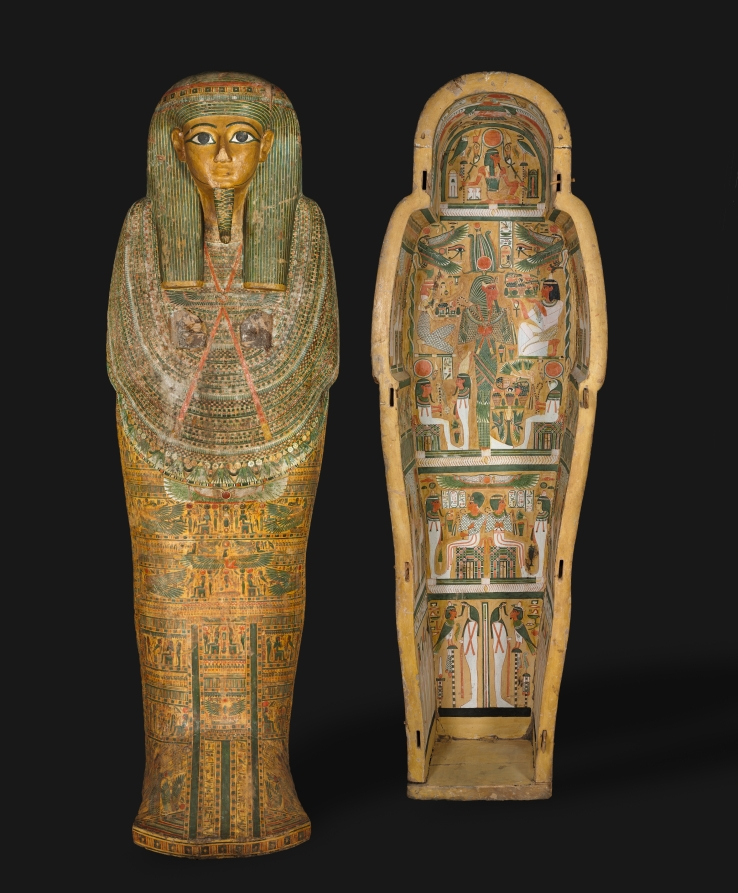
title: Coffin of Bakenmut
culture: Egypt, Thebes, Third Intermediate (1069–715 BCE), Dynasties 21–22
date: c. 1000–900 BCE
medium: gessoed and painted sycamore fig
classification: Funerary Equipment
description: The coffin of Bakenmut is one of the finest examples of painted wooden coffins made for the priests of Amen and their families at Thebes during Dynasty 21 and early Dynasty 22. The pharaohs of this time were no longer buried in the Valley of the Kings, but instead built tombs in the Delta, far to the north, where they resided. Security was lax in the Theban necropolis. The coffins and funerary goods of the wealthy citizens of Thebes were placed in unmarked and undecorated family tombs cut into the cliffs on the west bank of the Nile. All the care and detail that in more prosperous times were devoted to the decoration of the tomb chapel were now lavished on the elaborately painted coffins. Every available surface is crowded with religious scenes, images of funerary gods and goddesses, protective spells, and magical symbols. The deceased appears mummiform. An elaborate floral collar entirely covers the upper body, exposing only the separately attached hands (now lost). A pair of red "mummy braces" are crossed over the chest, their point of intersection marked by a winged sun disk. The lower body is covered with tiny figures modeled in gesso against a yellow background, which gives the effect of gold inlaid with glass or semiprecious stone. The decoration on the interior features two deified dead kings of Dynasty 18. Although these rulers had lived centuries before, memory of their greatness was still very much alive. The main scene near the top depicts Tuthmosis III, the great military pharaoh, who lived 500 years before Bakenmut. Posed as a mummy, the ruler wears a brilliant feathered garment enfolding him with falcon’s wings. The scene below features back-to-back seated images of Amenhotep I, regarded as the patron of the Theban cemetery and worshiped as a local god there.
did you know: Originally another smaller coffin was placed inside this outer coffin and in that the deceased with a mummy board would have rested.